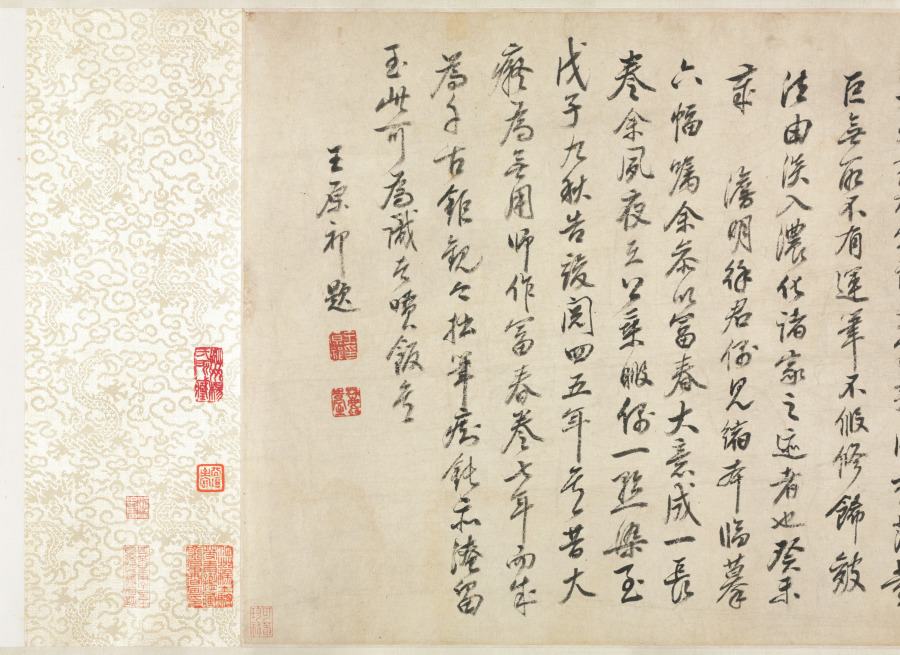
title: Green Peaks under Clear Sky: After Huang Gongwang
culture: China, Qing dynasty (1644-1911)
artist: Wang Yuanqi (Chinese, 1642–1715)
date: 1703–8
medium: handscroll; ink and light color on paper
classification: Painting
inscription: 晴巒霽翠：倣黃子久。麓臺。[印]石師道人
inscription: [印] 御書畫圖留與人看. 子久畫於宋諸大家荊、關、李、范、董、巨，無所不有。運筆不假修飾。皴法由淡入濃，化諸家之迹者也。澹明徐君偶見縮本，臨摹六幅。囑余參以富春大意，成一長卷。余夙夜在公，乘暇偶一點染。至戊子九秋告竣，閱四、五年矣。昔大癡為無用師作富春卷，七年而成，為千古鉅觀。今拙筆癡鈍。亦淹留至此。可為識者噴飯矣。王原祁題。[印]王原祁印; 麓臺 [印, 畫芯左下] 西廬後人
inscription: 3 additional colophons and 15 additional seals: 1 colophon and 9 seals of Yang Shicong 楊士驄 (b. 1870); 1 colophon of Wu Hufan 吳湖帆 (1894–1968); 1 colophon and 1 seal of Wu Mei (20th c.); 5 seals of Cheng Qi 程琦 (1911–1988).